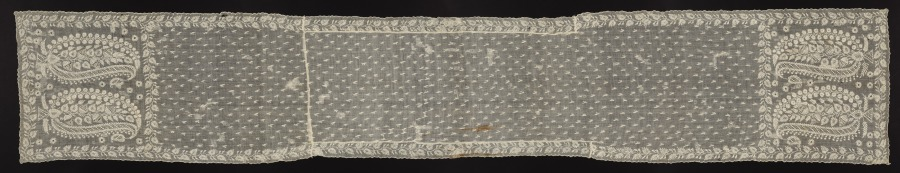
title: Head Veil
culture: India, Lucknow, late 1800s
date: late 1800s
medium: Cotton: needle lace (drawnwork) and embroidery (chikan)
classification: Embroidery